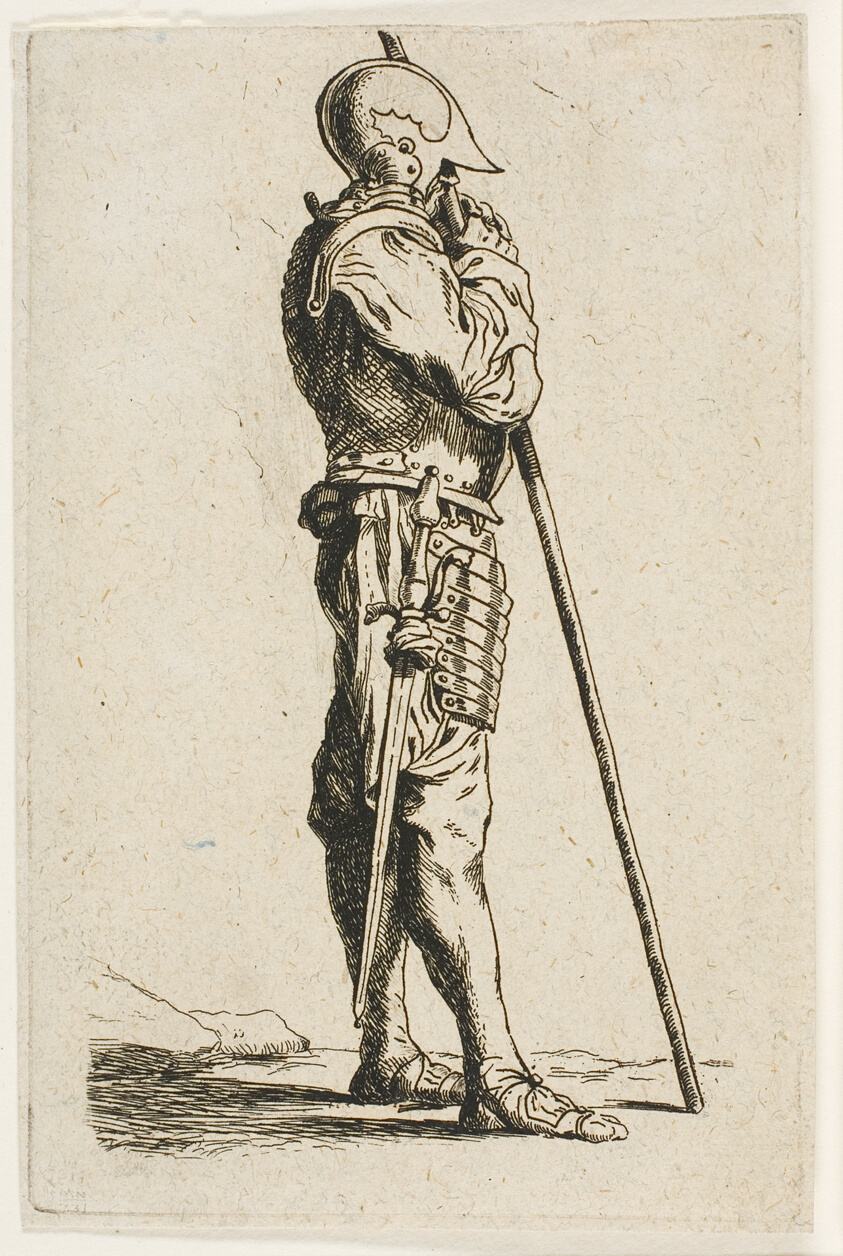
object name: Print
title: A Soldier Standing, in Profile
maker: Charles Meryon (French, 1821-1868); after Salvator Rosa (Italian, 1615-1673)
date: 1849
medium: Etching and drypoint on tan laid paper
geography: France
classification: etching; print; prints and drawing